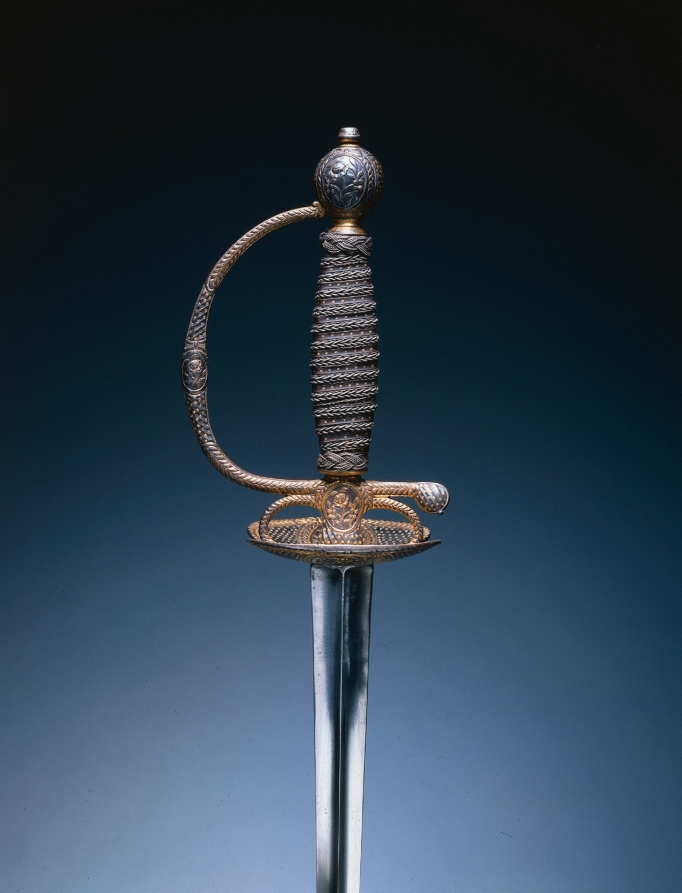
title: Small Sword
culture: France, Paris (?), 18th century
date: c. 1780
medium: forged steel blade; partially gilt and russet steel hilt; steel wire, leather bands, wood core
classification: Arms and Armor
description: During the 1700s, the small-sword emerged as a light, quick weapon. Like the rapier it was carried by unarmored civilians, the noblemen of the upper classes. Over time this delicate sword became more an accessory of male attire than a weapon essential to life and death. The sword hilt, which shows even when the blade is sheathed, became the ground for elaborate decoration. These small-swords thus represent the final stage in the evolution of the sword, from the edged weapons of antiquity to the elegantly refined blades of the 1700s and 1800s.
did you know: The fashion among gentleman for wearing small-swords with everyday attire began to wane by the end of the 1700s with the exception of the military dress sword.